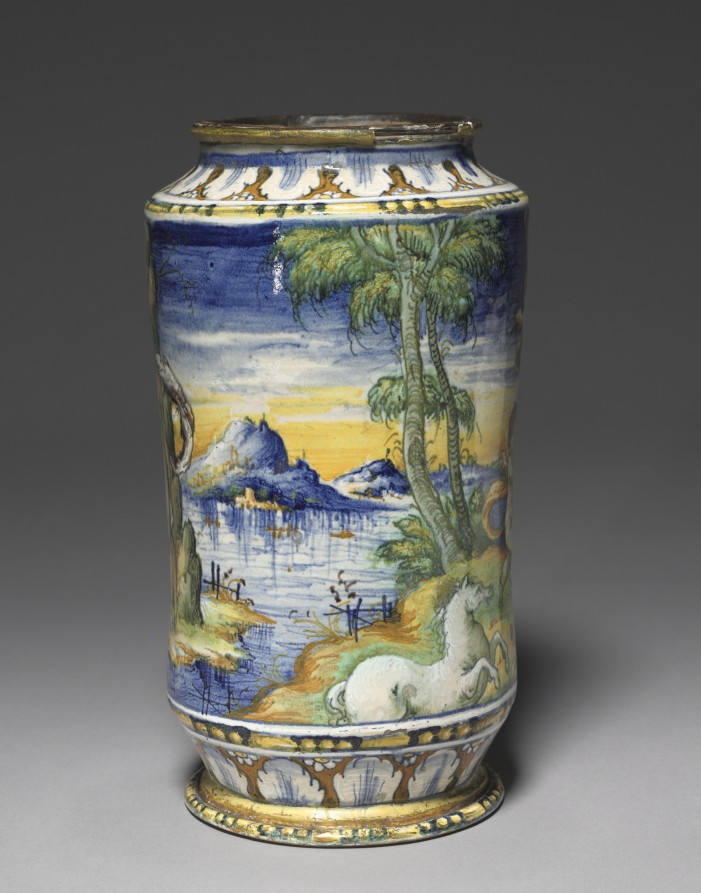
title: Pharmacy Jar (Albarello)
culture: Italy, Venice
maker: circle of Domenego da Venezia (Italian)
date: c. 1550–70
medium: tin-glazed earthenware (maiolica)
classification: Ceramic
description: Depictions of ancient myths were a popular subject for ceramic decoration during the Renaissance. This pharmacy jar features the myth of Perseus and Andromeda. According to Greek mythology, a sea monster was sent to destroy the kingdom of Ethiopia after Queen Cassiopeia offended the sea nymphs. To appease the gods, Andromeda was chained to a rock and offered as a sacrifice to the monster. Before the creature could devour her, Perseus flew in on his winged horse and slayed the beast.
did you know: Featuring a fashionably clad gentleman’s torso, this pharmacy jar displays the coat of arms of the Hercolani family, who made their fortune dealing in textiles for men’s clothing.